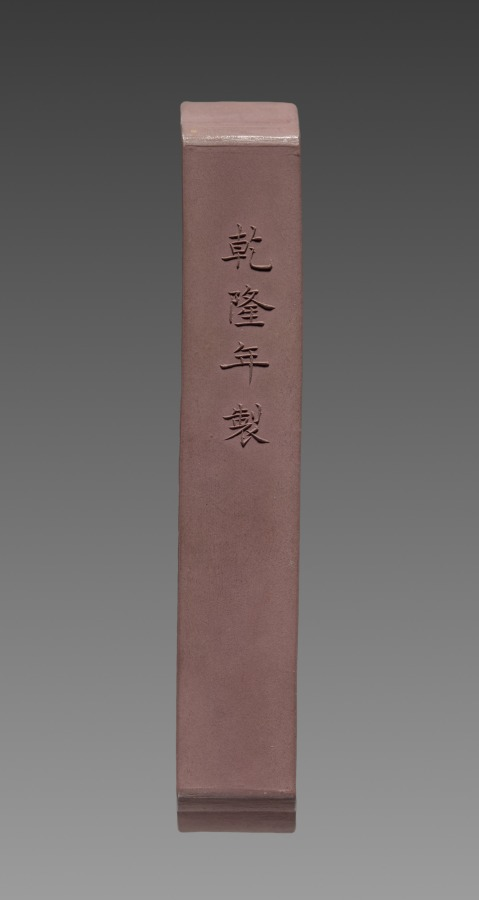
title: Ink Stick from an Imperially Commissioned Set of Ink Stick with Images and Poems of Famous West Lake Sites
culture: China, Qing dynasty (1644–1911), Qianlong reign (1736–95)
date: 1780–94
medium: Molded ink in brown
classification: Miscellaneous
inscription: 乾隆年製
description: This is one of ten ink cakes of different shapes and colors stored in an exquisite lacquer box. Each is inscribed in gold with a poem by the Qianlong emperor, praising the ten famous sights of the Westlake in Hangzhou, near Shanghai. The Westlake is famous for its natural beauty; it was a favorite imperial destination and remains a tourist attraction today. Ink cakes (also called ink sticks) are dissolved with the addition of water and ground on the surface of a flat stone into liquid ink for painting and calligraphy. The precious ink cakes here, however, have never been used.